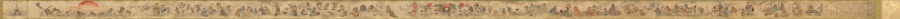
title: An Illustrated Marriage of Apparitions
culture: Japan, Edo period (1615–1868)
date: mid-1800s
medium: handscroll; ink and color on paper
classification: Painting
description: The matchmaking, engagement, wedding, and birth of the first child of two apparitions, or bakemono, literally "things that change," are illustrated in this whimsical, humorous handscroll. Japanese folklore abounds with such strange creatures, most famously represented in handscrolls featuring a procession of 100 supernatural monsters. Aside from a textual preface and cartouches indicating the content of the scenes, the tale is told visually. The artist and whereabouts of the original handscroll are unknown, but a number of other 19th-century copies by amateur painters exist in Japanese collections, attesting to its broad appeal.